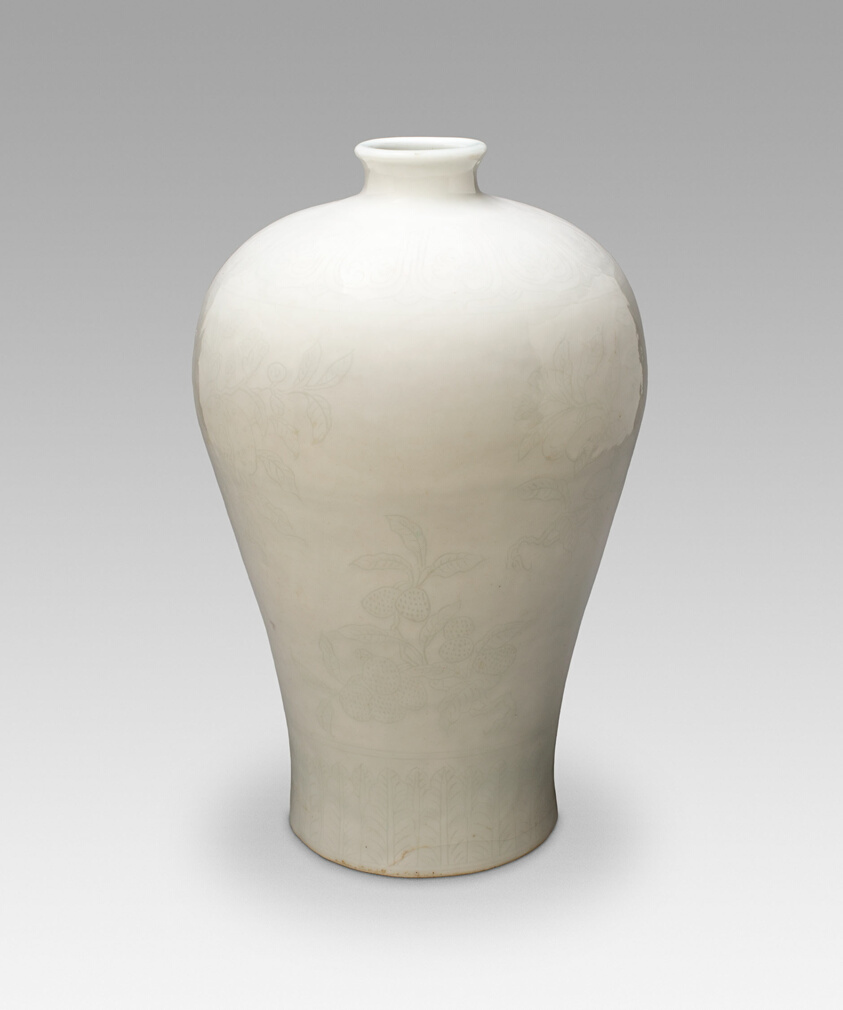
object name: Vessel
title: Vase (Meiping) with Peach, Pomegranate, Peapod, and Lychee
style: Chinese (culture or style)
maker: China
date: Ming dynasty (1368–1644), Yongle period (1403–1424)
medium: Porcelain with underglaze incised decoration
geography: China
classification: vase; vessel; porcelain; ceramics; asian art